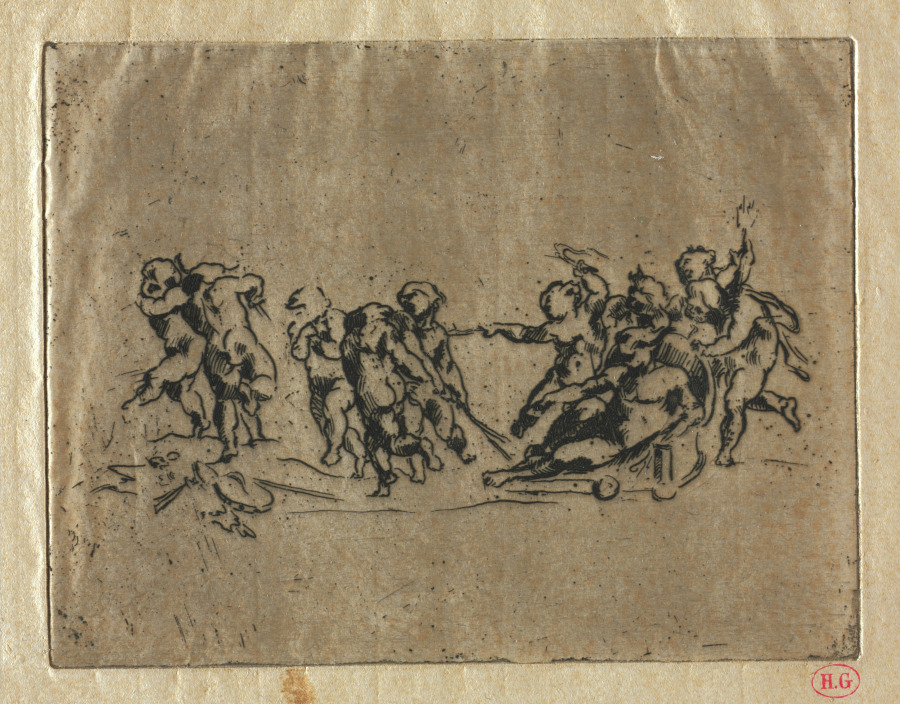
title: Bacchanal with Children and Chariot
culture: France, 19th century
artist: Jean-Baptiste Carpeaux (French, 1827–1875)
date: c. 1860–70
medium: etching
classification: Print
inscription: below the lower right platemark edge: stamp for Hector Giacomelli (Lugt 1311)